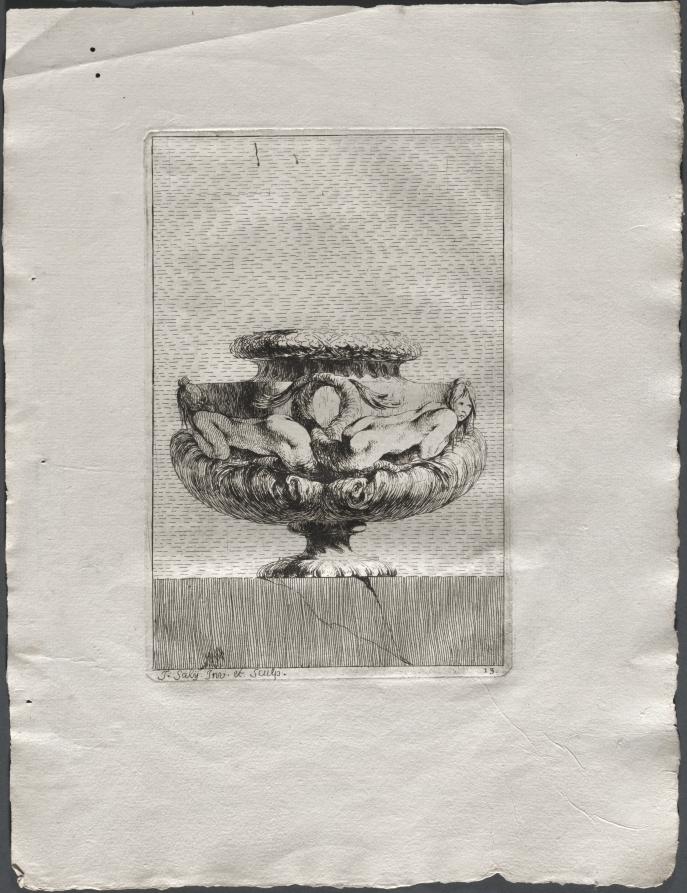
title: Suite of Vases: Plate 13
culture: France, 18th century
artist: Jacques François Saly (French, 1717–1776)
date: 1746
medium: etching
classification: Print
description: Designing ornamental vases or urns was particularly popular during the mid-18th century since the only limit to the possibilities was the imagination of the artist. Saly, a sculptor by training, was a student at the French Academy in Rome from 1740 to 1746, at which time he published a set of 30 etchings. Saly began with basic antique vase forms but deviated from classical ornament to use a rich variety of fantastic creatures for embellishment.